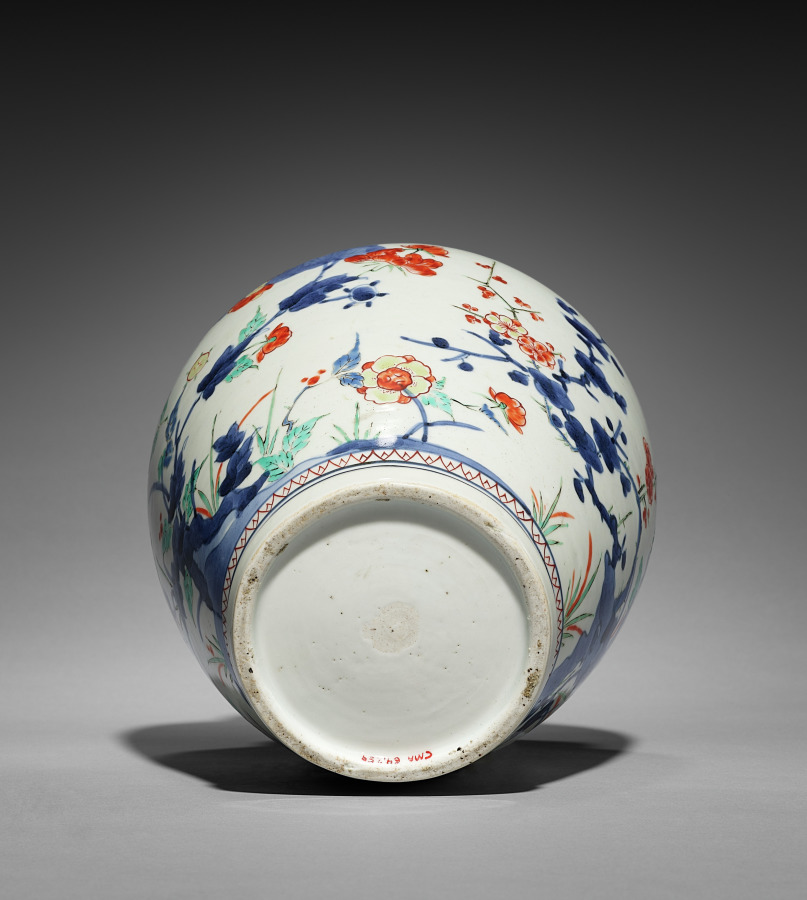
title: Covered Jar with Chrysanthemums, Peonies, and Plum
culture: Japan, Edo period (1615–1868)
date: late 1600s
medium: porcelain with underglaze blue and overglaze color enamel (Hizen ware, Kakiemon type)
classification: Ceramic